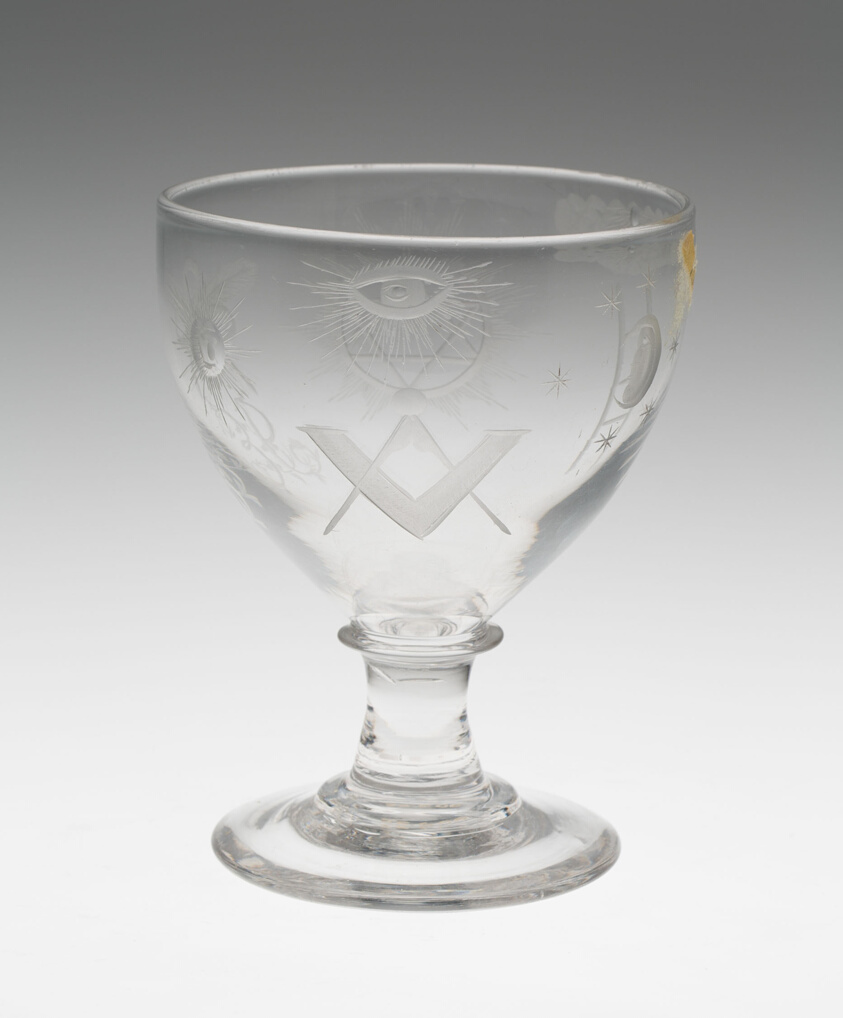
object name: Glass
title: Rummer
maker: England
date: c. 1750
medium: Glass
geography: England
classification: glass; european decorative arts